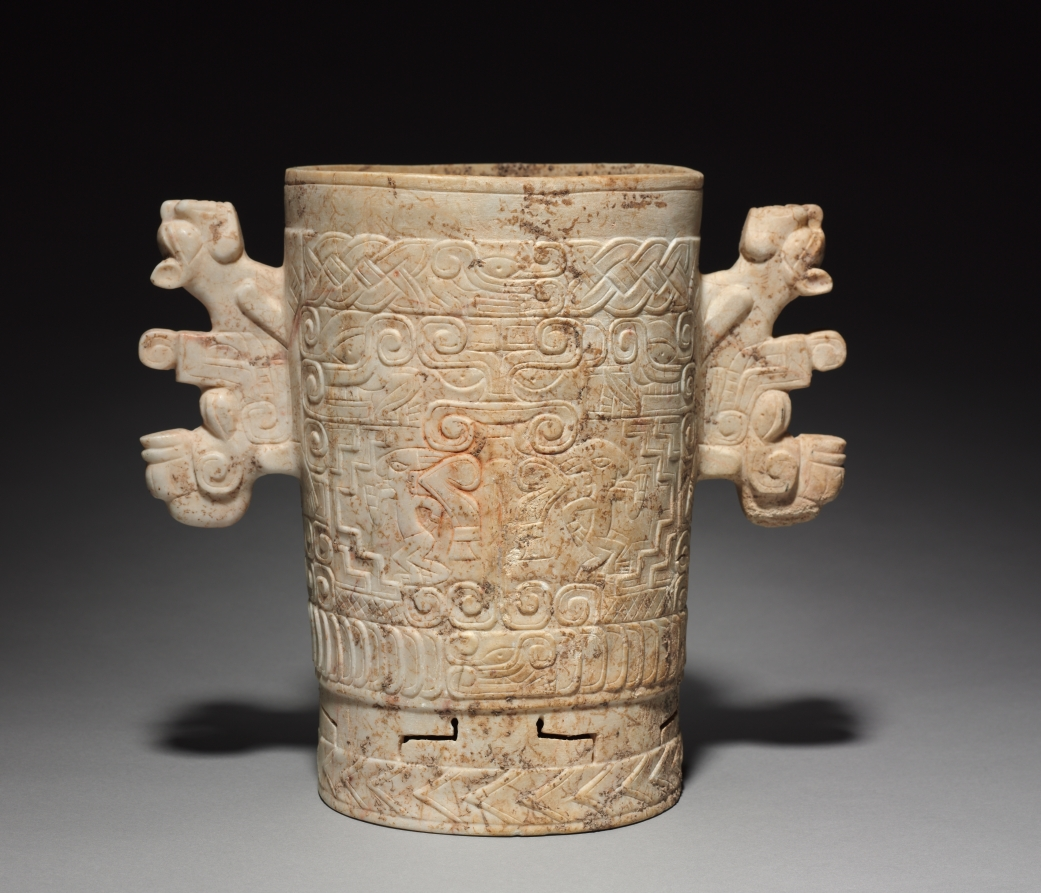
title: Carved Stone Vessel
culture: Northwest Honduras, Ulúa Valley, 8th-10th century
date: 700–1000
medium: marble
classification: Sculpture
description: This stone vessel, made by eastern neighbors of the Maya, is one of the finest and largest of its kind. On the exterior are several motifs that combine to create an unusually complex design that features a grotesque head, either in profile or front-facing, with a leg near its mouth. In the main panel a frontal version of the head hovers over two legs, the knees pointed sharply outward. Beside each leg is a lively human, rarely seen in such works. Little is known about the motifs’ meanings or the vessel’s use.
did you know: Carved in the round, the vessel's handles suggest a feline that emerges from a serpent-like head with an upturned snout.